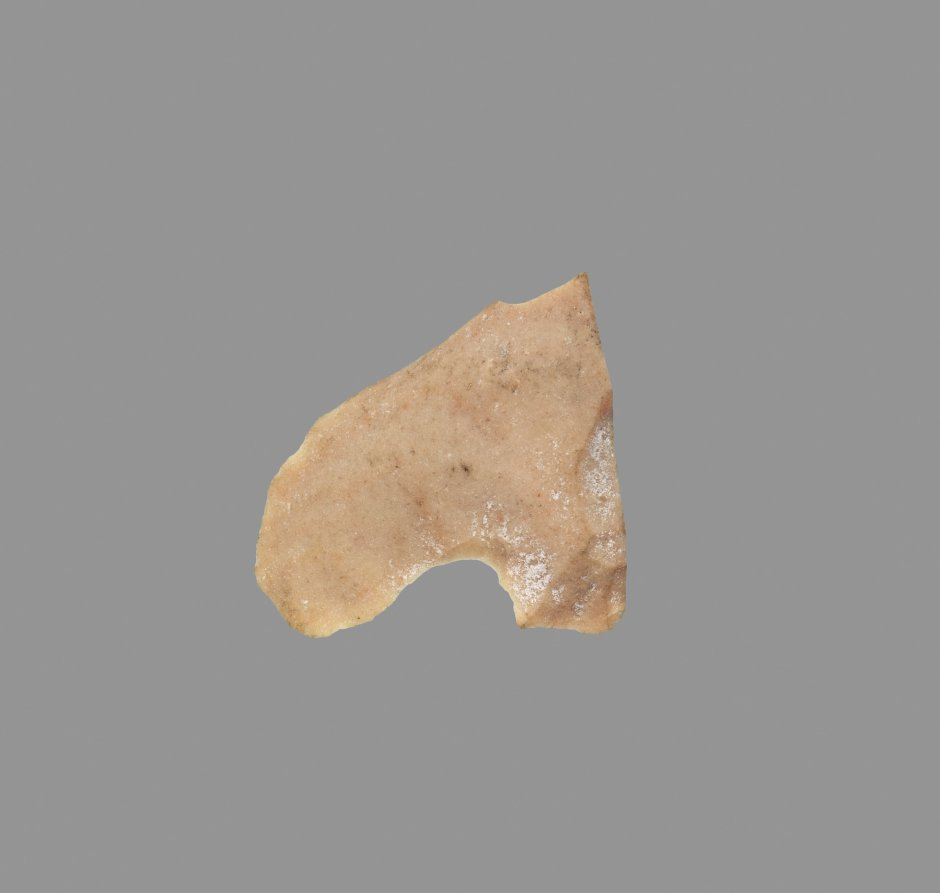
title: Sickle Blade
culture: Egypt, Middle Kingdom (2040–1648 BCE), Dynasty 12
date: 1980–1801 BCE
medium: flint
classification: Implements